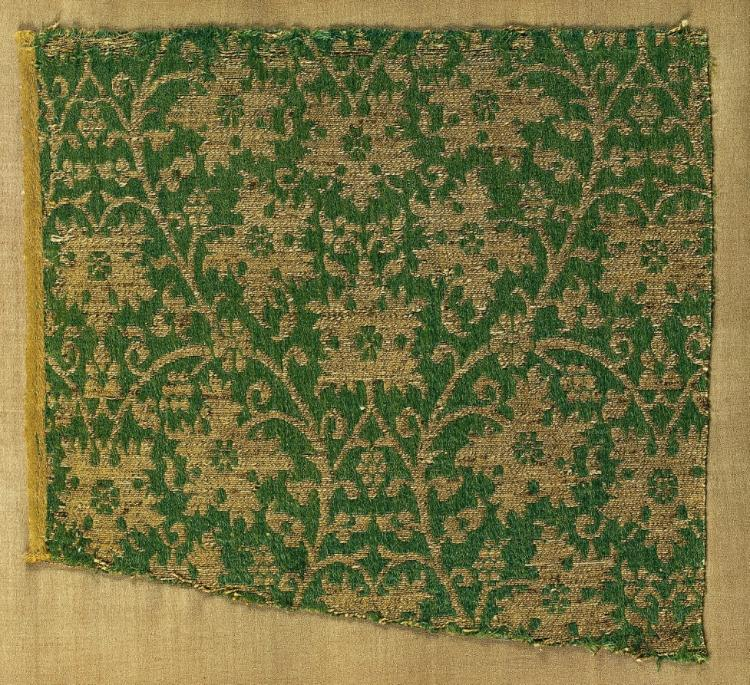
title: Lampas with scrolling vines and grape leaves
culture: probably Iran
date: 1300s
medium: lampas: silk and gold thread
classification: Textile